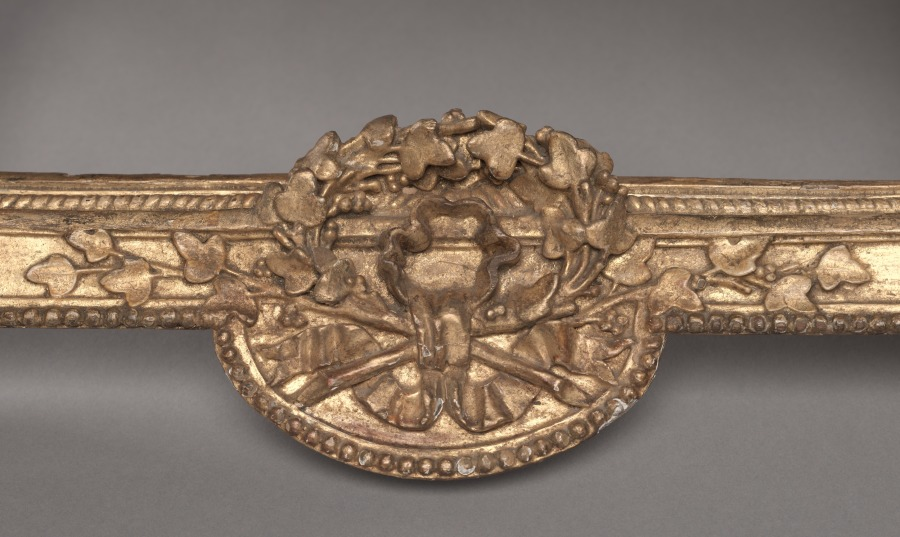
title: Stool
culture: France, 18th century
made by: Jean-Baptiste-Claude Sené (French, 1748–1803)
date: 1786–1787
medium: carved and gilded wood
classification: Furniture and woodwork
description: This stool was made in 1786-1787 for the Queen's gaming room at the palace of Compiègne.